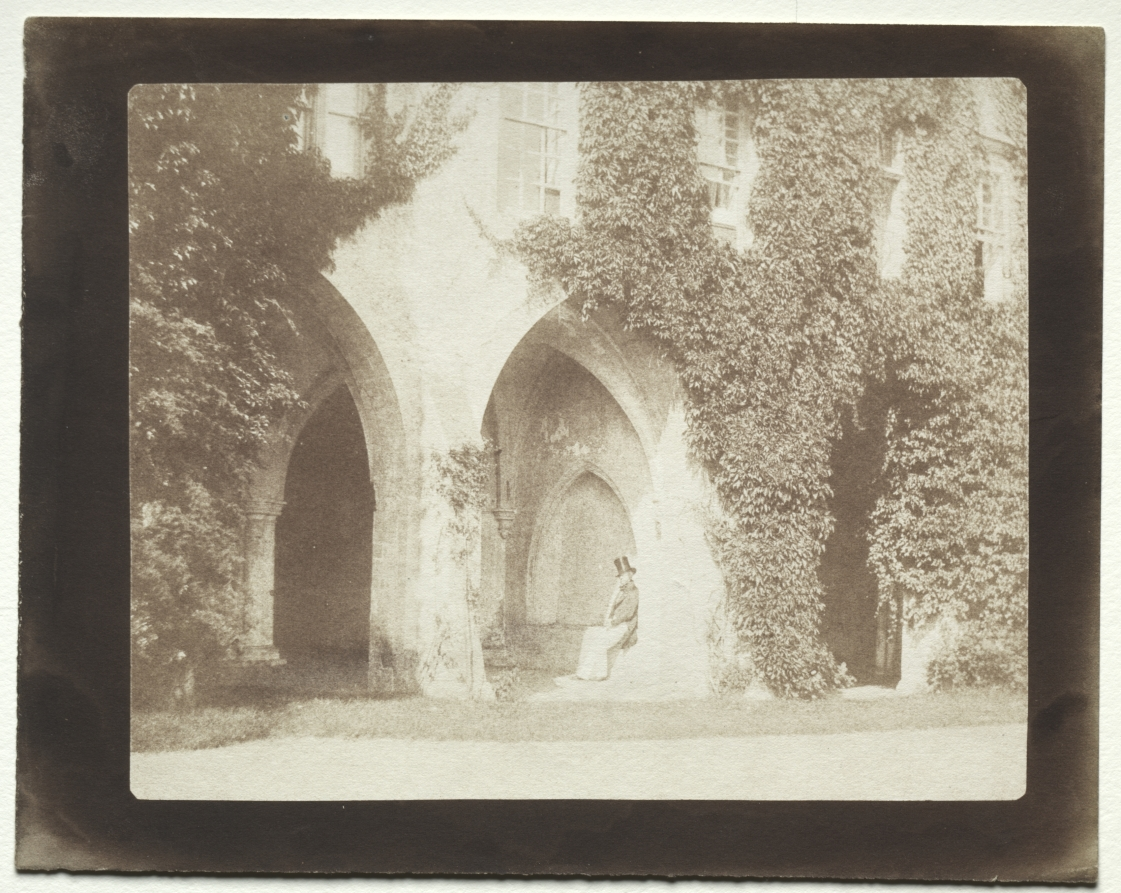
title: Calvert Jones Seated in the Sacristy of Lacock Abbey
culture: England, 19th century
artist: William Henry Fox Talbot (British, 1800–1877)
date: 1845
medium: salted paper print from calotype negative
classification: Photograph